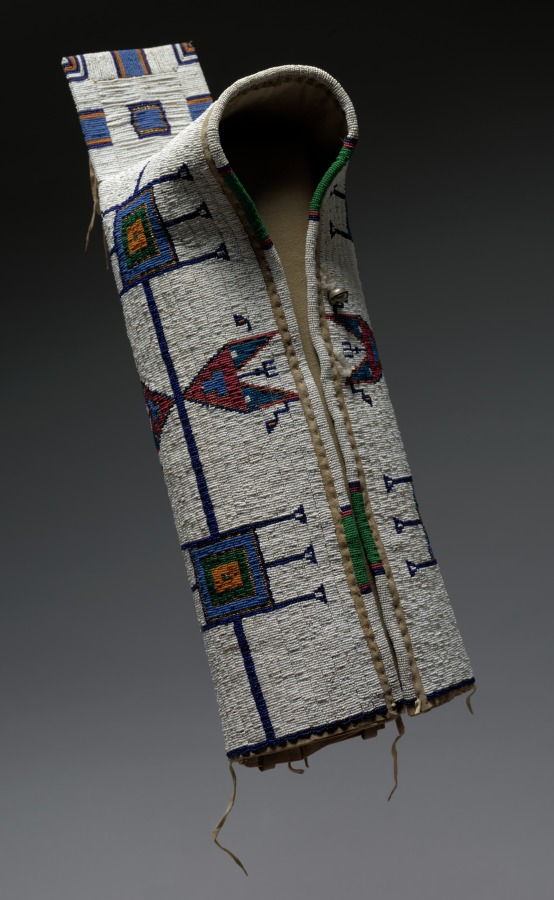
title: Cradle or Baby Carrier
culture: Native North America, Plains, Lakota (Sioux)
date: c. 1900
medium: Native-tanned hide, cotton cloth, glass beads, metal beads, brass bell, sinew thread, cotton thread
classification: Leather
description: Many Plains peoples hold lavishly quilled or beaded cradles in high esteem—they bestow spiritual benefits on the infant and prestige and honor on the family and the maker, usually a female relative. Indeed, today and in the past, creating such a cradle is often regarded as equal to counting coup, the ultimate act of male bravery in which a warrior touches an enemy with a stick known as a coup stick. This cradle was held in the arms; others have wooden frames that can be propped against a support, such as a sofa or a tree, to ease the baby’s socialization into the community.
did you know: In the past, young Plains children spent much of their time in cradles, which remain in occasional use today.